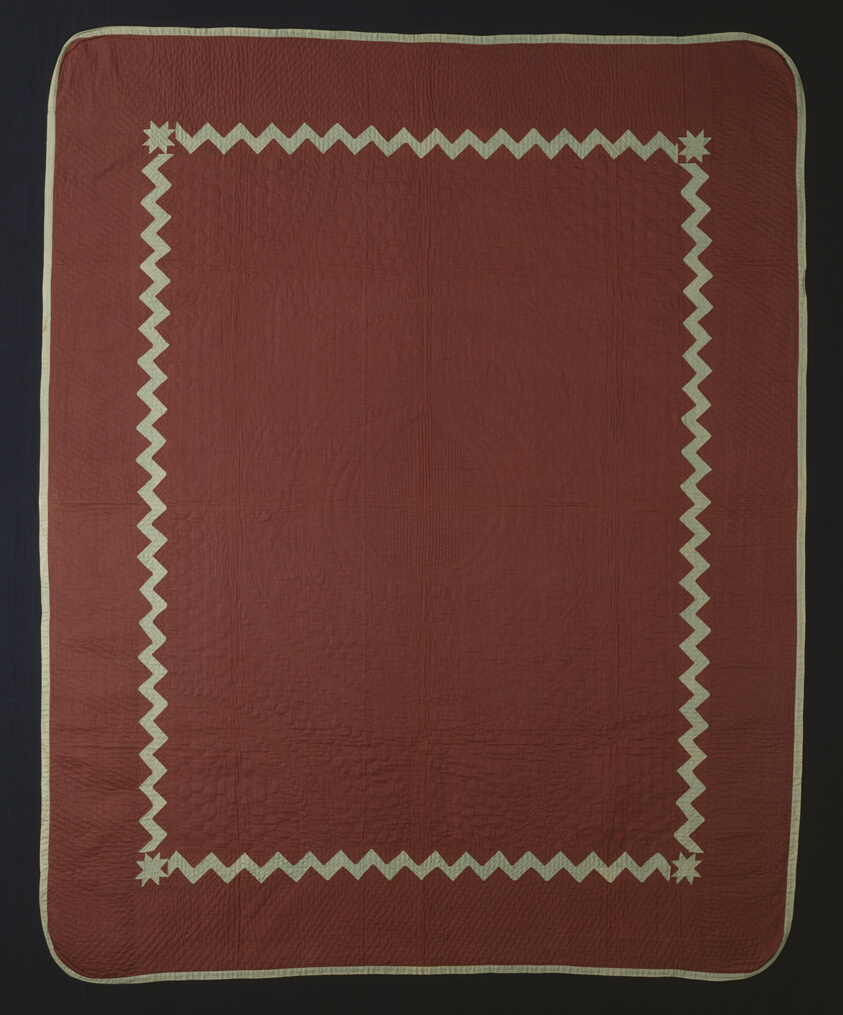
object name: Textile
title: Bedcover (Amish Plain Quilt)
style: amish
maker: United States, Ohio, Holmes County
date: c. 1890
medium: Cotton, plain weaves; pieced; backed with cotton, plain weave; cotton batting; quilted with cotton thread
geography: Ohio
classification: textile; needlework - quilt